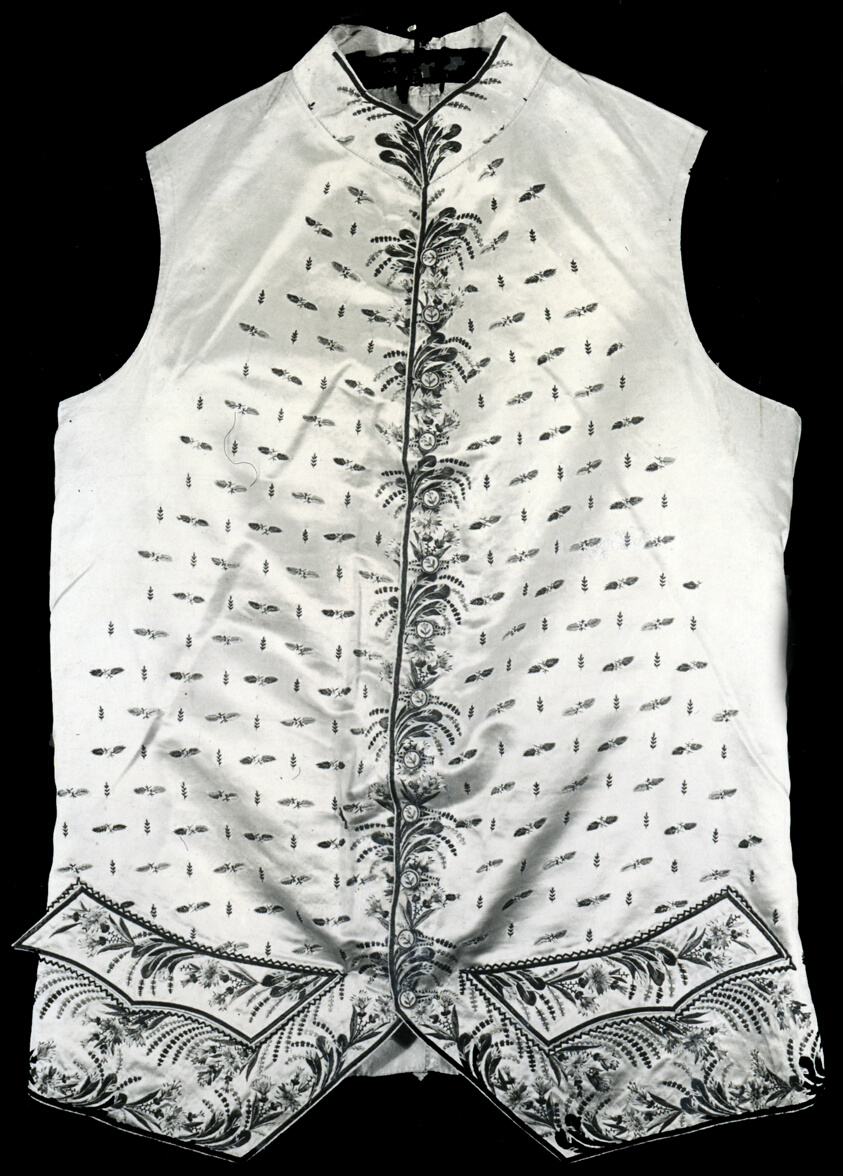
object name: Costume and Accessories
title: Waistcoat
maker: France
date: 1775/1800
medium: Silk, satin weave; embroidered with silk floss in satin (or flat), stem, straight, slanting satin border stitches; French knots; buttonholing has couched strands around it, couched chenille, tambour border on buttons; lined in silk, twill weave and linen, plain weave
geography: France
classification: textile; needlework (visual works); costume; dress (garment); clothing